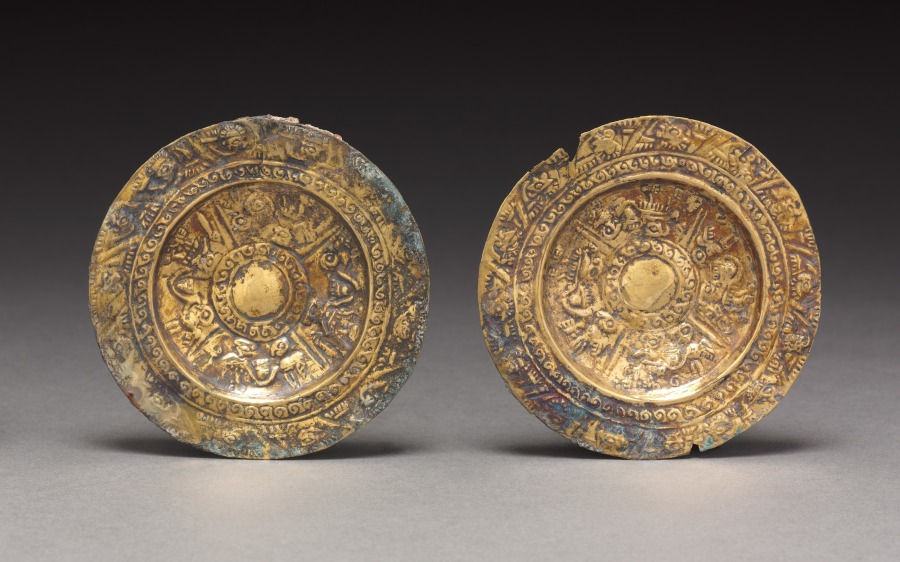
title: Pair of Ear Ornaments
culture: Peru, North Coast, Sicán, 9th-14th century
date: c. 800–1370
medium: hammered and embossed gold alloy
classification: Metalwork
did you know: Wearing large ear ornaments, a privilege of the nobility, permanently stretched the earlobes.